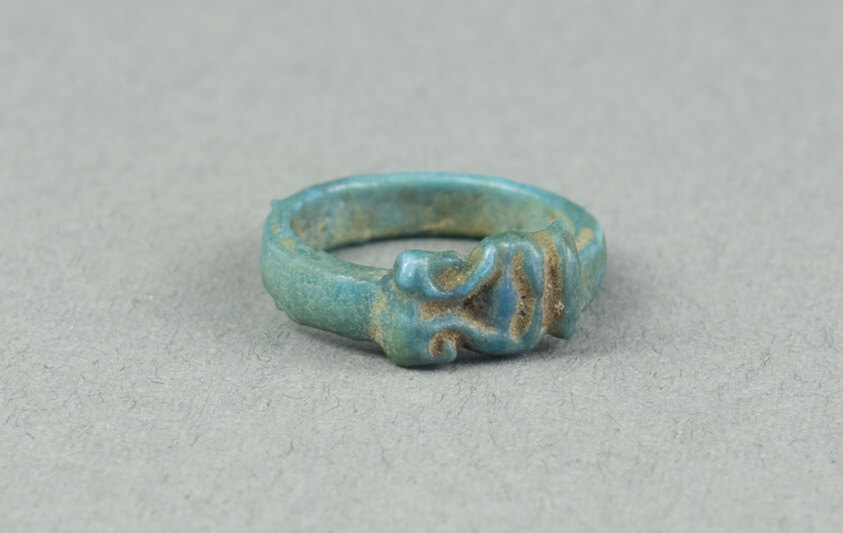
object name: Costume and Accessories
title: Ring: Head of Hathor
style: egyptian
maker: Egyptian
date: New Kingdom, Dynasty 18 (about 1390 BCE)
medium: Faience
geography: Egypt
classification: ring (jewelry); ceramics; jewelry; ancient art; costume; faïence (composite material)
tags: goddesses